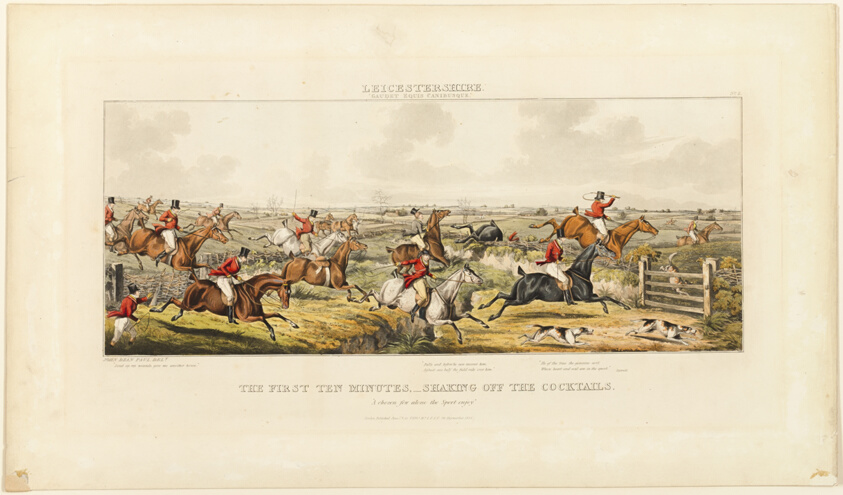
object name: Print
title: The First Ten Minutes, plate two from The Leicestershire Hunt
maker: John Dean Paul (English, 1775-1852); published by Thomas McLean (English, 1788-1875)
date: published 1825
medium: Hand-colored aquatint on ivory wove paper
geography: England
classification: aquatint; print; prints and drawing